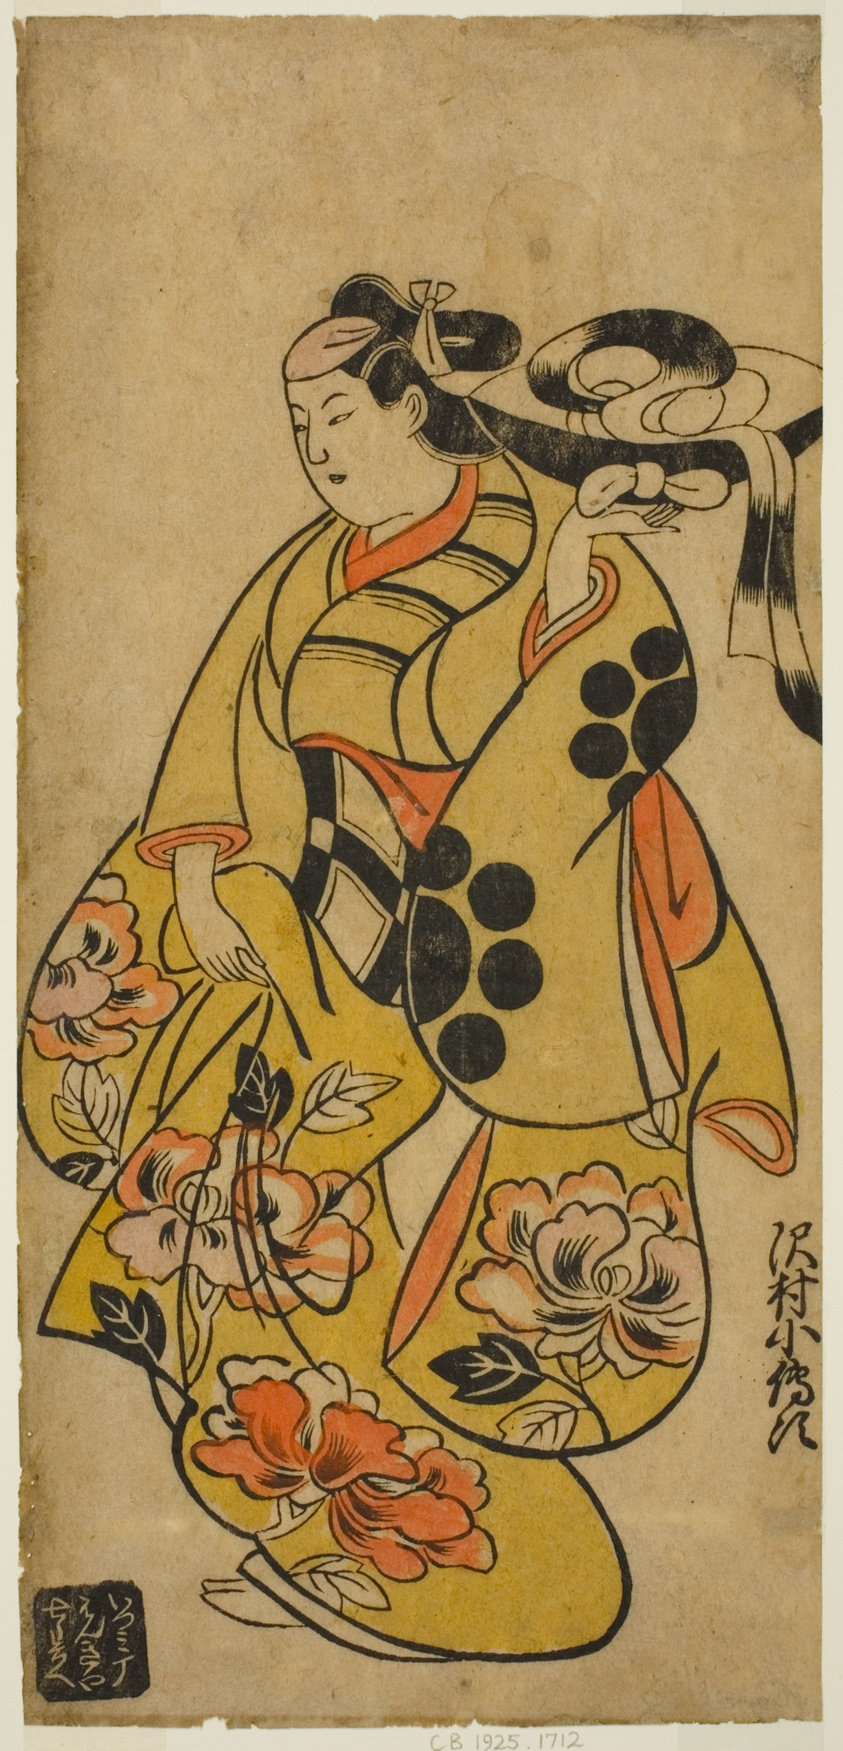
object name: Print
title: The Actor Sawamura Kodenji I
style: Japanese (culture or style)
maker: Attributed to Torii Kiyonobu I; Japanese, 1664–1729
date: c. 1700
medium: Hand-colored woodblock print; hosoban, tan-e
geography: Japan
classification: woodblock print; print; asian art